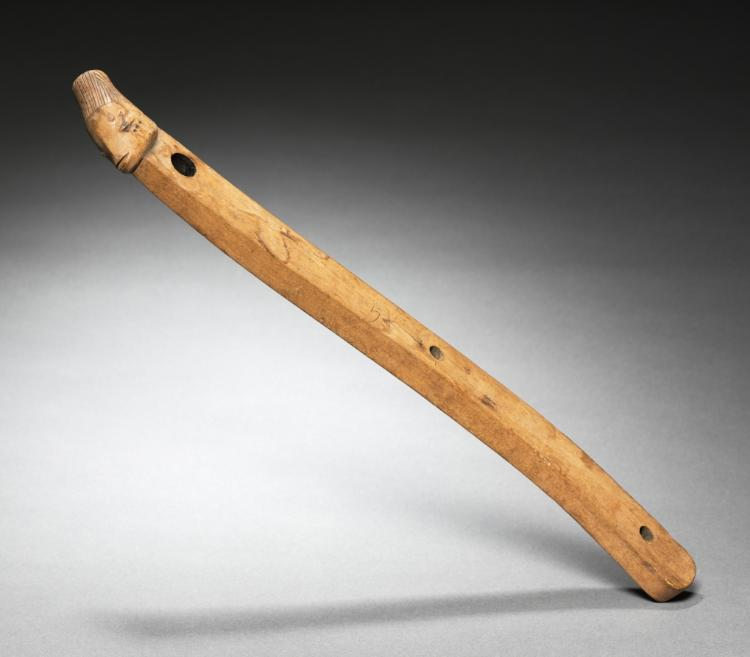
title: Part of a chair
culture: Africa, Central Africa, Democratic Republic of Congo, Mangbetu style, unknown carver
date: 1900s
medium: Wood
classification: Furniture and woodwork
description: This wooden piece is part of a folding chair. Along with a similarly shaped and ornamented piece, it was part of the frame for the plaited reed seat. The holes were functional and allowed the frame of the chair to open or close. The most elaborate decoration was reserved for the upper back of the chair. The simple carving at the top of this fragment depicts a Mangbetu woman with an elongated head.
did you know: When chairs were used, their wood became a rich, dark brown. The light color of this fragment suggests it was never used and may never have been assembled into a chair.